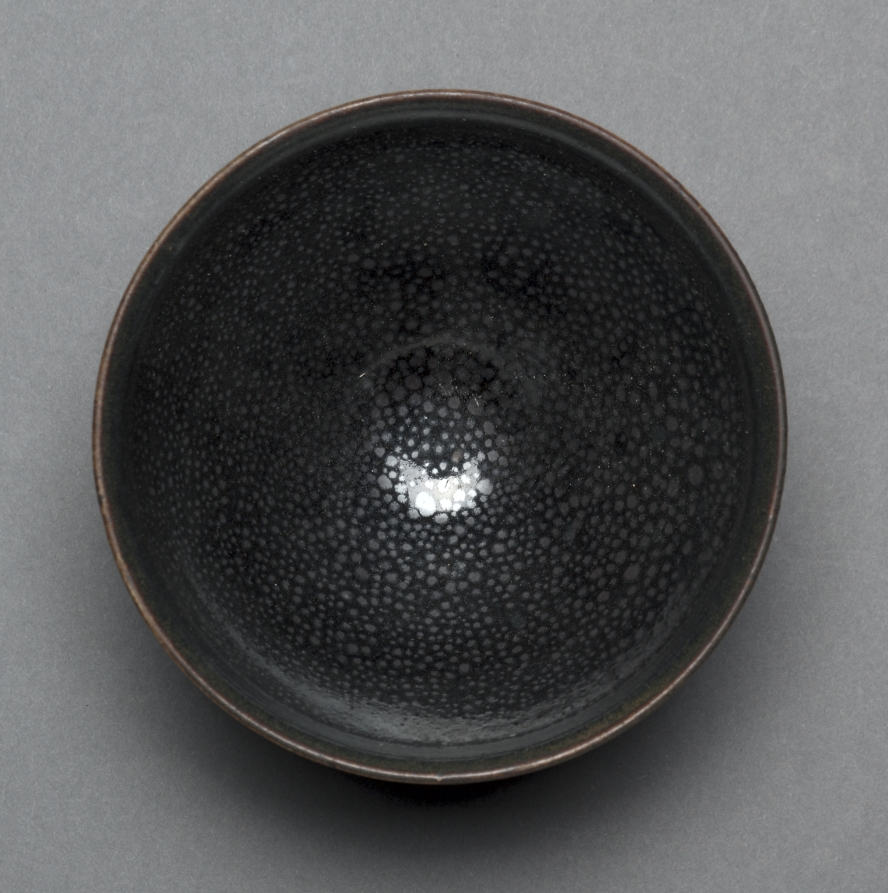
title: Tea Bowl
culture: Northern China, Henan province, Northern Song dynasty (960-1127) or Jin dynasty (1115-1234)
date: 1100–1200s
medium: stoneware with "oil spot" glaze, black ware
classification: Ceramic